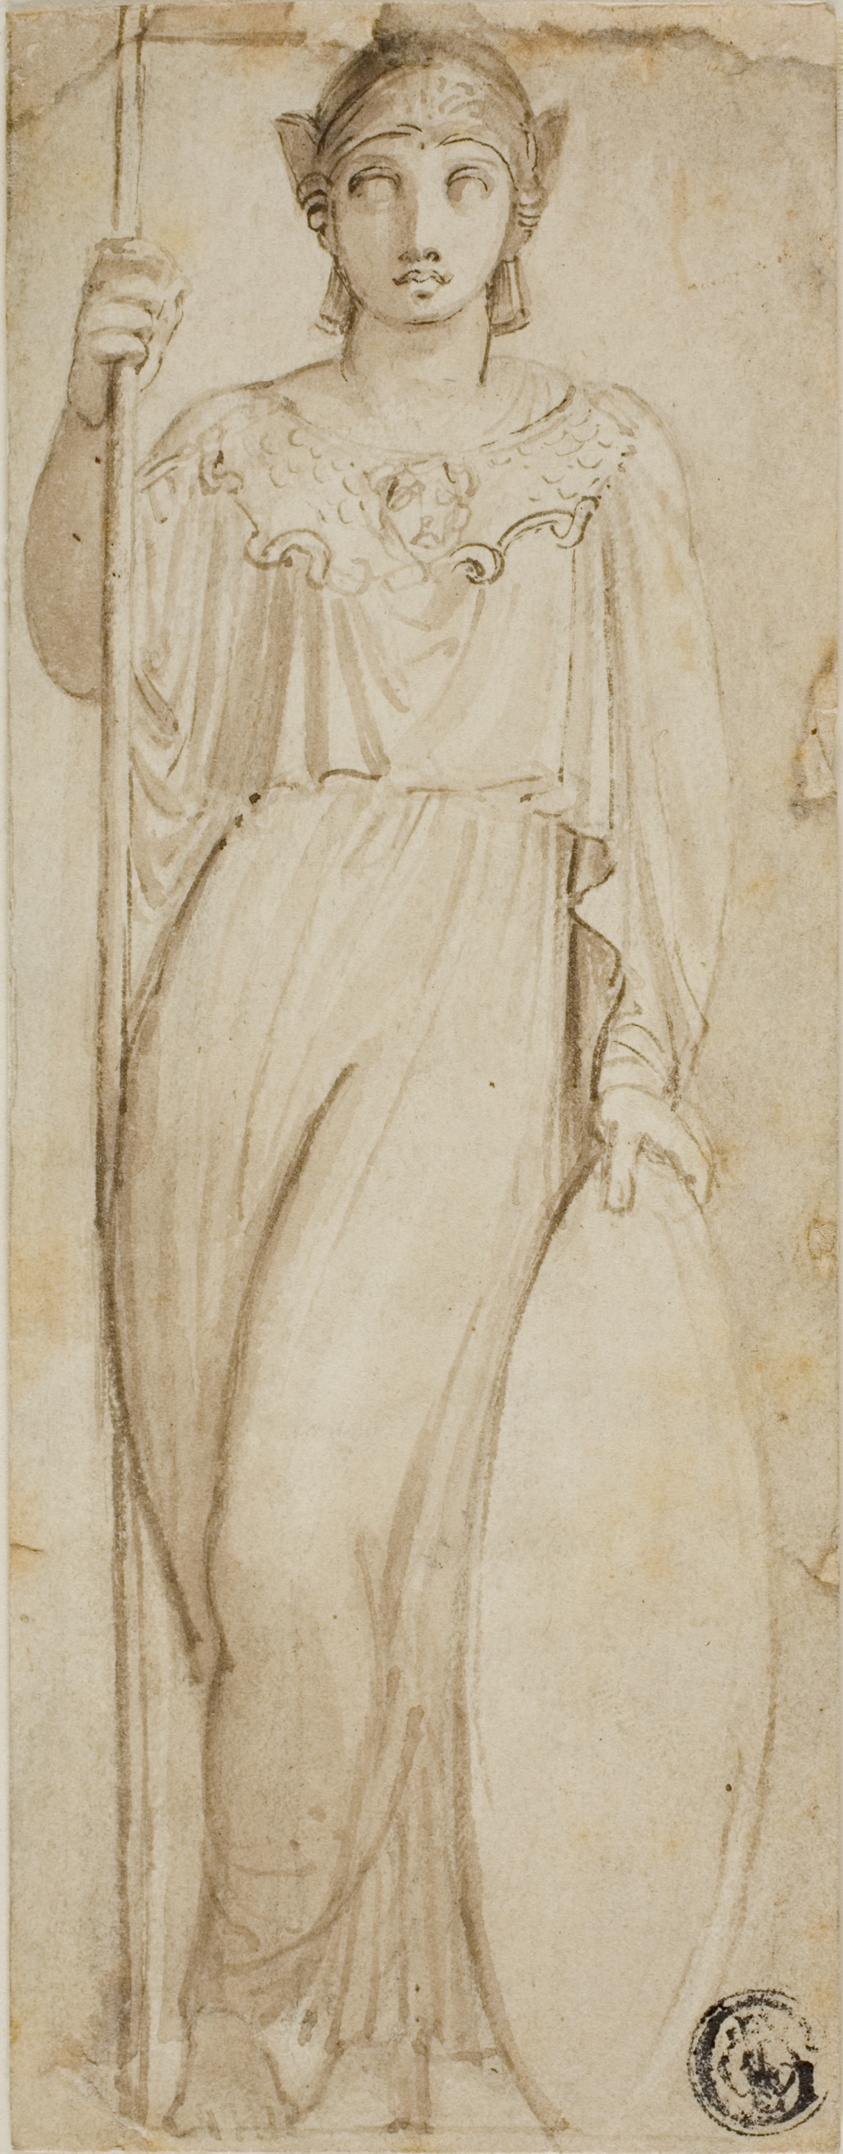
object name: Drawing and Watercolor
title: Athena, or Britannia identified as Athena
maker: Attributed to Thomas Stothard; English, 1755-1834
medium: Pen and brown ink with brush and brown wash, over traces of graphite, on ivory wove paper, laid down on cream wove paper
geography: England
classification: pen and ink drawings; drawings (visual works); prints and drawing